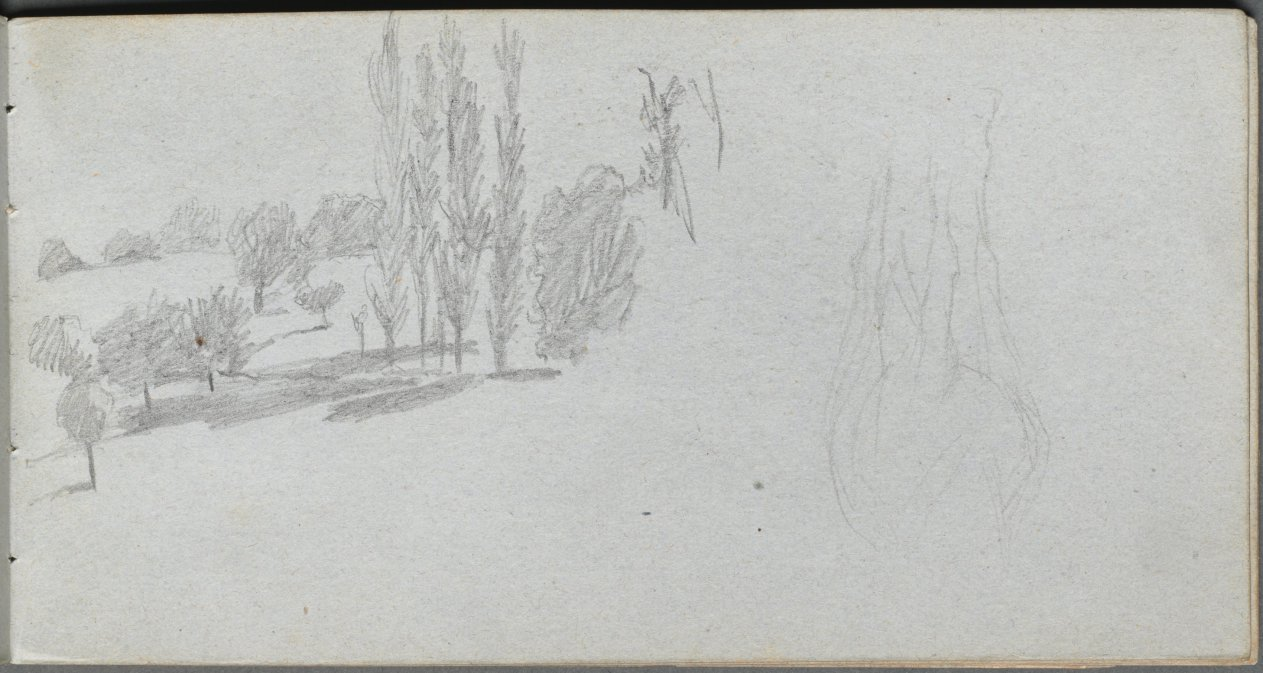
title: Sketchbook, page 18: Study of a Horse and Landscape Study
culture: France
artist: Ernest Meissonier (French, 1815–1891)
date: c. 1860s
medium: graphite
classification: Bound Volume